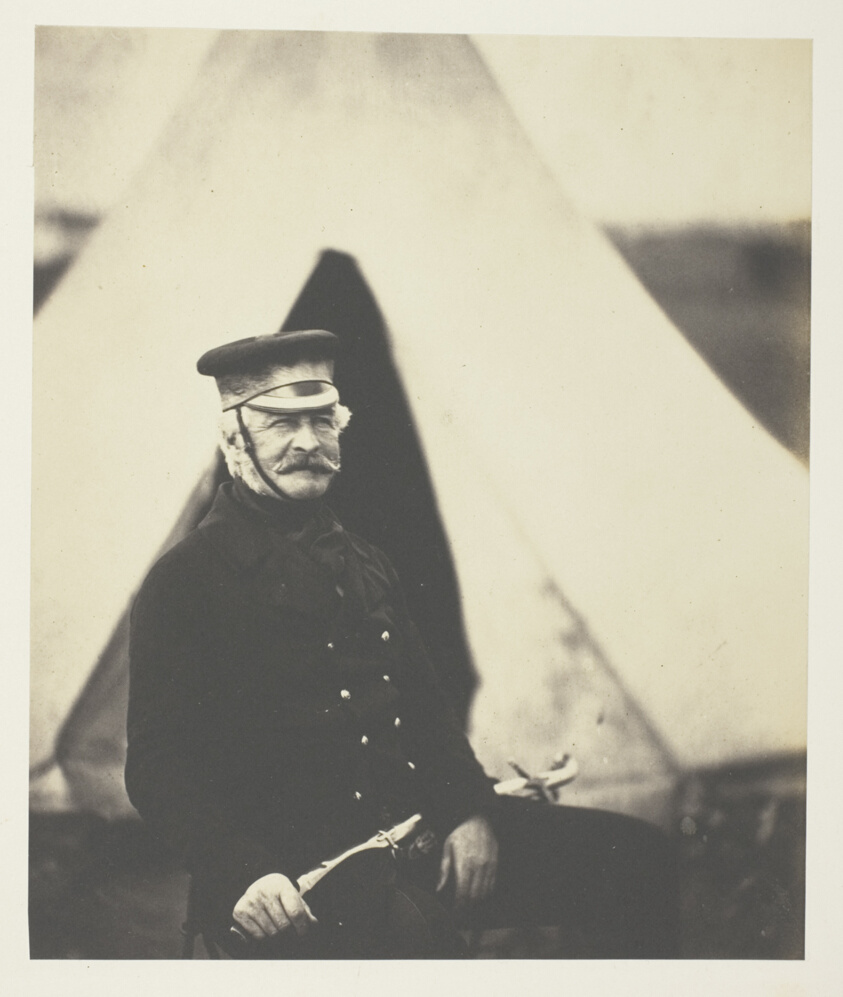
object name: Photograph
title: Lieutenant General Sir Richard England, K.C.B.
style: 19th century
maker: Roger Fenton (English, 1819–1869)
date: 1855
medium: Salted paper print, plate 34 from the album "Photographs Taken in the Crimea" (1856)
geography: England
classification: salted paper print; photographic process; photography; photograph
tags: Collected by Hugh Edwards, Crimea 1856